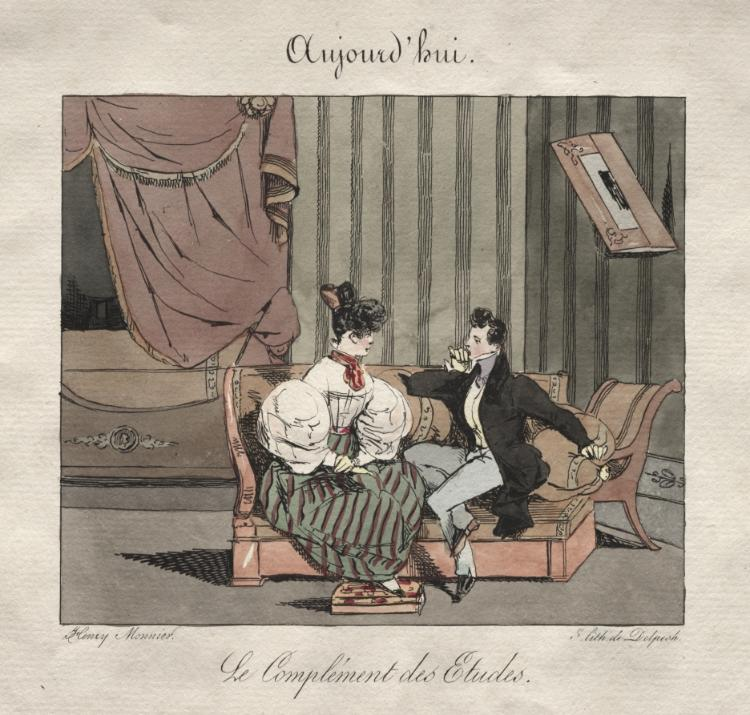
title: The Complement of the Students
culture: France, 19th century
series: Parisian Occasions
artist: Henry Bonaventure Monnier (French, 1805–1877)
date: c. 1857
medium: color lithograph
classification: Print